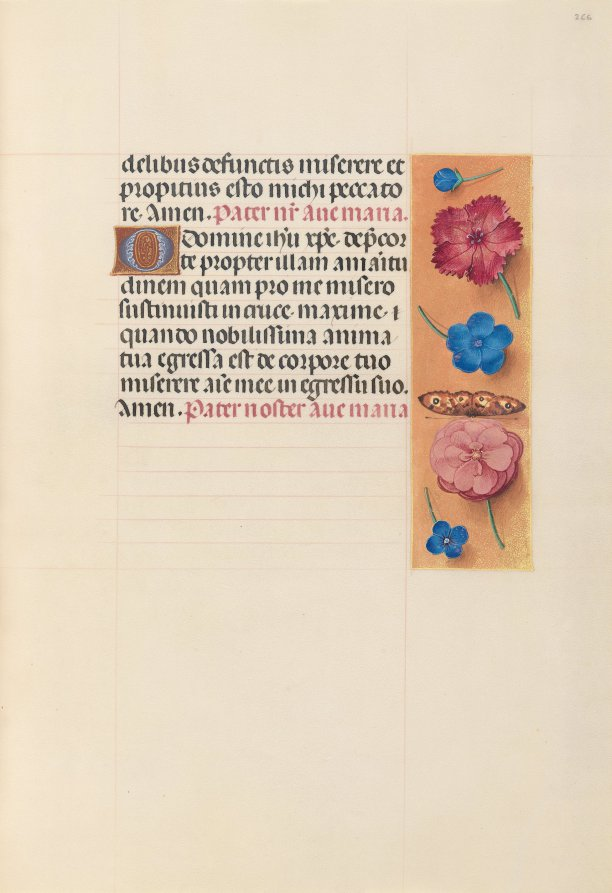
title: Hours of Queen Isabella the Catholic, Queen of Spain: Fol. 266r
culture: Flanders, Ghent and Bruges, late 15th century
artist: Master of the First Prayerbook of Maximillian (Flemish, c. 1444–1519)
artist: and Associates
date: c. 1500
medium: ink, tempera, and gold on vellum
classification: Bound Volume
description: This manuscript was illuminated by a circle of at least five highly organized manuscript painters active in the Flemish cities of Ghent and Bruges. The principal illuminator was Alexander Bening, who painted the majority of the book's miniatures. Manuscripts produced by this circle of artists are renowned for the decoration of their borders, which typically feature a rich variety of realistically-painted flowers, birds, and butterflies. This prayer book, called a book of hours, was intended not for a cleric, but for the private devotions of a lay person-in this case, Isabella the Catholic, Queen of Spain (1451-1504). Isabella's coat of arms embellishes the book's frontispiece. It is unlikely that the book was commissioned by the Queen herself; rather, she probably received it as a diplomatic gift from someone courting her patronage, perhaps Cardinal Francisco Jimenez de Cisneros. A Franciscan friar, Jimenez was dependent upon Isabella for his advancement, first to the post of Queen's confessor in 1492, and then to Archbishop of Toledo in 1495.